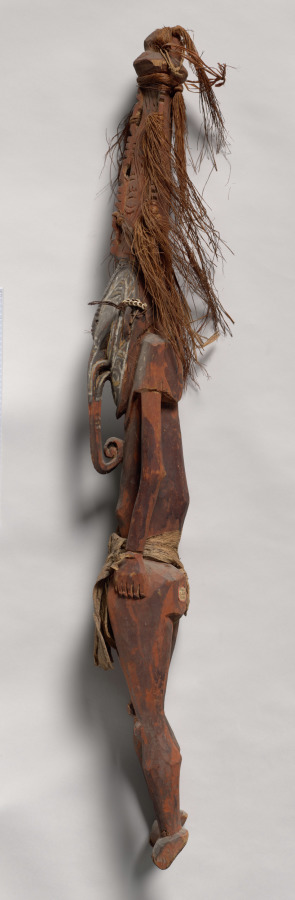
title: Ancestral Figure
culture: Melanesia, Papua New Guinea, Sepik River region, 19th century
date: 1800s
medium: painted wood with fiber and tapa cloth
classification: Sculpture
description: In the Sepik River region, village social and ceremonial life centers on the men's house. Ritual objects such as slit gongs, orators' stools, and flutes are stored there; the most sacred objects are kept hidden from women and children. Carved wooden figures, which probably represent ancestors, were preserved in the men's houses.